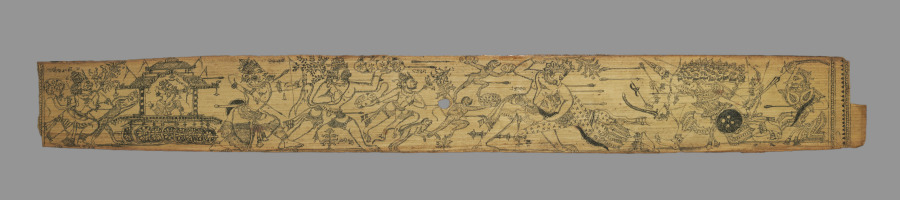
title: The Monkeys and Bears Fight Ravana and His Demons (verso), from a Romance of Chandrabhanu and Lavanyavati of Upendra Bhanja (Indian, died 1740)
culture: Eastern India, Odisha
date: late 1700s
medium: Charcoal on palm leaf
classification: Painting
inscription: on both recto and verso in Oriya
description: This leaf from an 18th-century romance manuscript comes from a section of the book that retells the epic battle between the demon Ravana and the god-hero Rama. The 10-headed multiarmed demon Ravana is the second figure from the right. Rama’s army of monkeys and bears, wielding tree branches and clods of earth, fill the remainder of the leaf. The images were created using a stylus that incised into the palm leaf; charcoal was then rubbed over the leaf and wiped off, leaving only the incised areas in black.